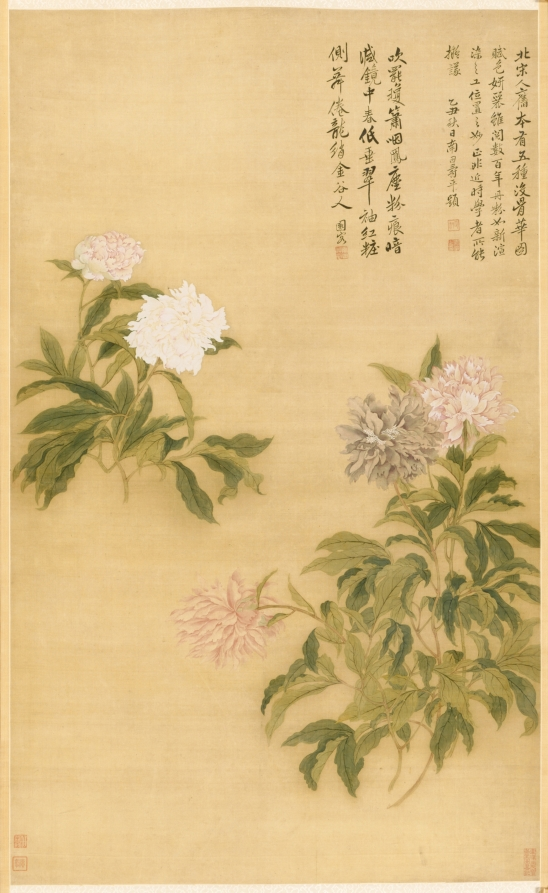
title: Herbaceous Peony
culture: China, Qing dynasty (1644-1911)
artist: Yun Shouping (Chinese, 1633–1690)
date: 1685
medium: Hanging scroll; ink and color on silk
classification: Painting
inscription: Artist's inscription, signature, and 3 seals: An old painting by an anonymous painter of the Northern Song Dynasty has five varieties of flowers painted in the boneless manner. Its colors are so beguiling and beautiful, that even after several hundred years its lead pigments are like new. The skill with which the ink and colors were applied and the subtlety of its composition find no equal among modern followers. On an autumn day in the yichou year [1685], Nantian, Shouping inscribed. [2 seals] Zhengshu; Shouping zhi yin.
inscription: Artist's poem (not translated). Signed Yuange. [seal] Nantian caoyi.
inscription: 3 additional seals of C. C. Wang 王季遷 (1907–2003).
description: Yun Shouping came from Piling (modern Changzhou), Jiangsu province, a center of floral, plant, and insect painting. He had joined the anti-Manchu resistance, was briefly imprisoned, and witnessed the death of family members in 1644. Like other artists, Yun Shouping expressed his Ming loyalism in coded pictures. The peony, king of flowers, and a spring garden motif developed new meaning during the Qing dynasty. The inscription indicates that Yun turns the flower into a motif representing the glorious past. The herbaceous peonies here appear somewhat withered and pale, with faint reddish veins running through its broken branches, perhaps a coded message. The inscription reads, An old painting by an anonymous painter of the Northern Song Dynasty has five varieties of flowers painted in the boneless manner. Its colors are so beguiling and beautiful, that even after several hundred years its lead pigments are like new. The skill with which the ink and colors were applied and the subtlety of its composition find no equal among modern followers.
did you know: In East Asian art, peonies traditionally symbolize prosperity and wealth.